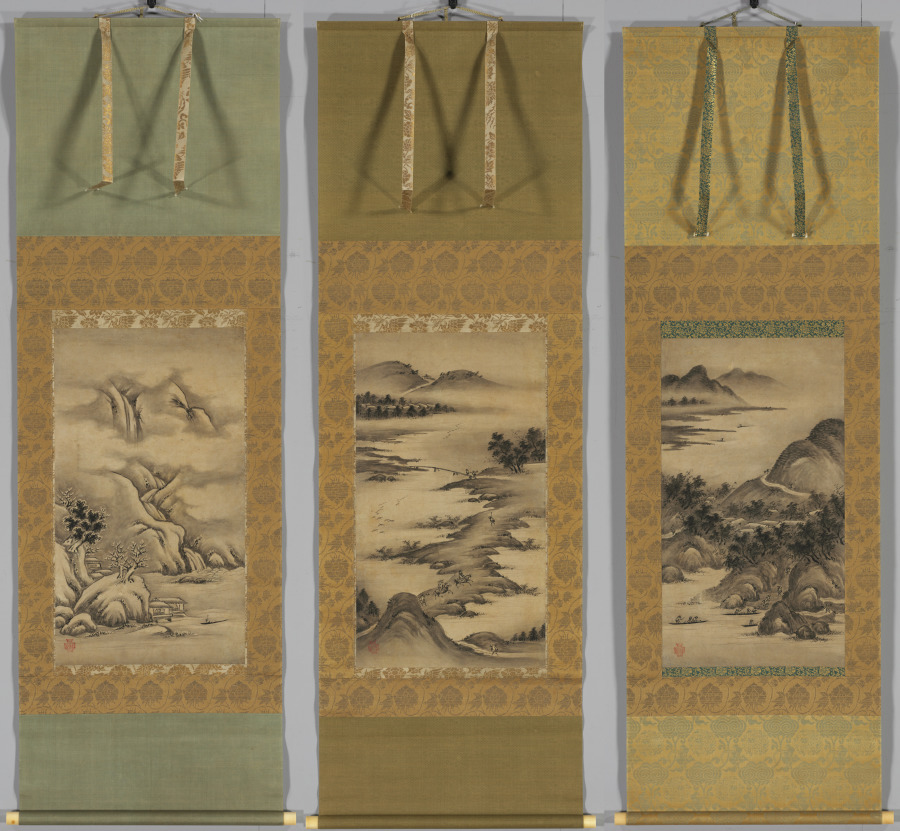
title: Seasonal Landscapes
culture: Japan, Muromachi period (1392–1573)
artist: Kano Hideyori (Japanese, active mid- to late 1500s)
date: mid- to late 1500s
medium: hanging scroll; ink on paper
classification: Painting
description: Now comprising three scrolls, this composition was originally a set of four paintings depicting the seasons. The set is among the most important of the artist’s surviving works. Each painting was executed in the gyō mode, indicating a speedy brush with rounded strokes. The terms shin (formal), sō (cursive), and gyō (semicursive), borrowed from calligraphy terminology, are terms commonly used by connoisseurs to describe brushwork in ink paintings.